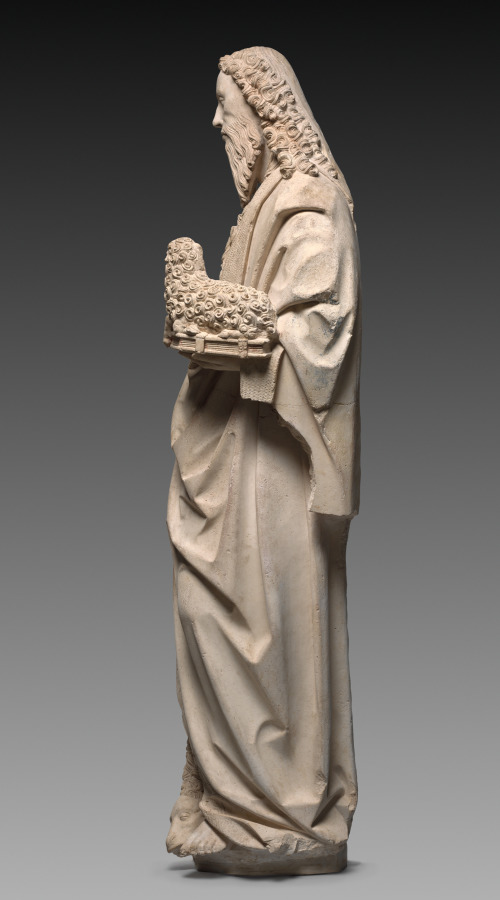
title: Saint John the Baptist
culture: French, Lorraine, Nancy or Bar-le-Duc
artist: attributed to Jan Crocq (Netherlandish, act. 1486–1510)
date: c. 1500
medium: Tonnerre limestone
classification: Sculpture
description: John the Baptist was one of the most beloved and widely venerated saints of the Middle Ages. He is depicted here wearing his traditional camel hair fleece beneath a luxuriant outer mantle. The sculpture is attributed to Jan Crocq, a Netherlandish artist active at the court of René II, Duke of Lorraine at Nancy from 1486 to 1510, and noted for his naturalistic treatment of hair and costume.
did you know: St. John the Baptist holds a book and a lamb, referencing his description of Christ as "the lamb of God."